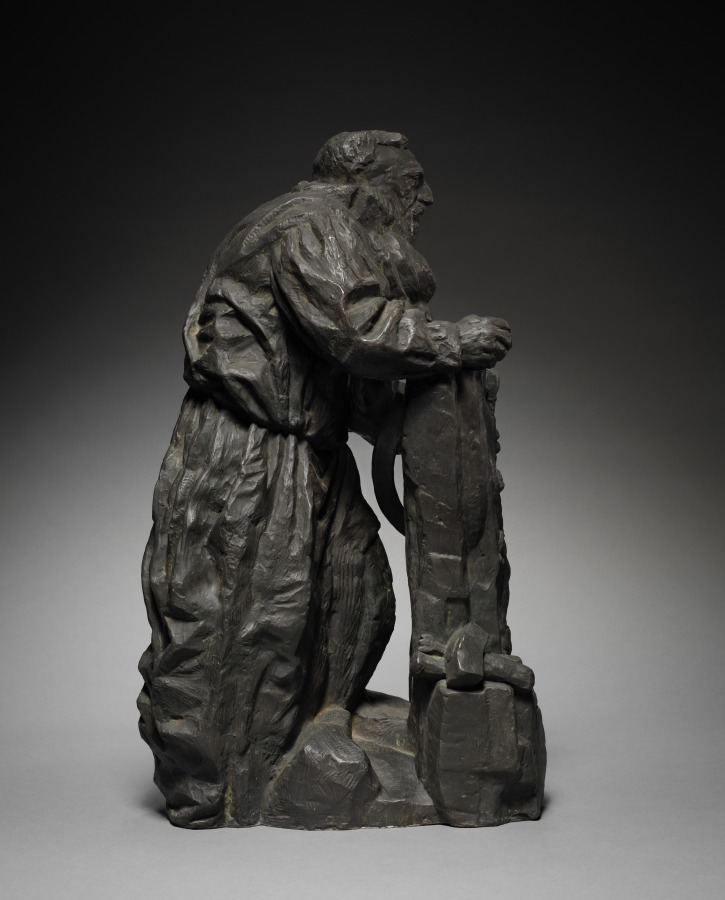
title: Rodin Working on "The Gates of Hell"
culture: France, 20th century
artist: Emile Antoine Bourdelle (French, 1861–1929)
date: 1910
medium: bronze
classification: Sculpture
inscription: Inscribed on side: "Rodin travaillant a la porte de l'enfer"; "Emile-Antoine Bourdelle, 1910"